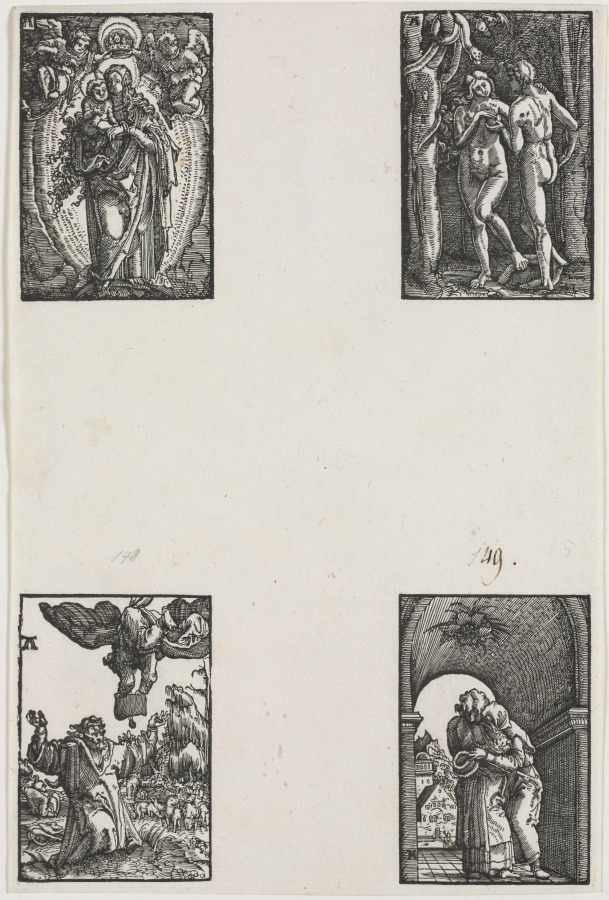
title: The Fall and Redemption of Man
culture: Germany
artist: Albrecht Altdorfer (German, c. 1480–1538)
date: c. 1513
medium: woodcut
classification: Print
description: These eight woodcuts come from a series of forty which illustrate the story of Christian redemption from original sin to the Last Judgement. Probably to maximize printing efficiency and quality, eight woodblocks were printed on each of five sheets of paper, but the subjects are not in the correct chronological order. Prior to sale, the sheets were cut into eight pieces. The sheets in the museum's set were only cut in half, preserving four prints per page. The numbers after the titles of the individual images indicate each scene's place within the narrative. By 1513, Altdorfer had already executed a number of small, finely detailed engravings. Because it is difficult to achieve the same degree of precision using woodcut, The Fall and Redemption of Man is a technical tour de force. Probably inspired by Albrecht Dürer's Small Passion (1511)-but almost double the size-the only contemporaneous comparable set of fine miniature woodcuts, Dance of Death, was designed by Hans Holbein in about 1526 (on view nearby).